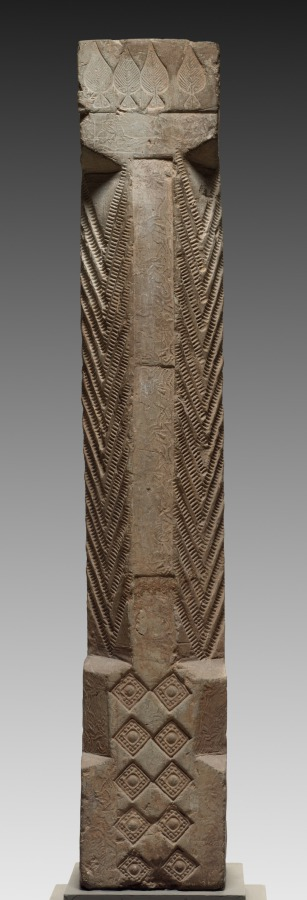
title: Hollow Tile: Column from Tomb-Chamber Doorway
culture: China, Han dynasty (202 BCE–220 CE)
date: 100–200 CE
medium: earthenware, die-stamped relief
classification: Ceramic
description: Striding tigers (top), racing horsemen (right column), and reverent officials (left column) are stamped into the surface of this underground portal to a tomb. The doorway preserves in stone the post-and-lintel structure, a basic element of Chinese wooden architecture. By the first century CE, a revolution in Chinese tomb construction and furnishing had taken place. Tombs lined with decorated bricks and tiles replace the earlier tombs constructed with only rammed-earth walls. Ceramic surrogates or models of stoves, houses, servants, and pets filled these more durable chambers, symbolically extending the creature comforts of this world into the world after death.